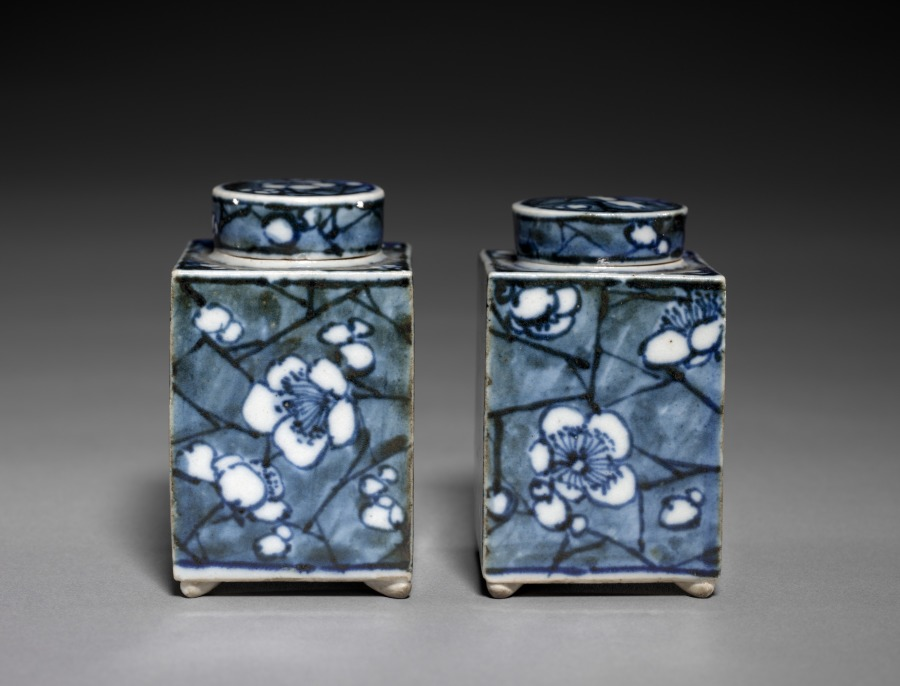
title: Pair of Tea Containers with Plum Blossoms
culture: Japan, Edo period (1615–1868)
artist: Aoki Mokubei (Japanese, 1767–1833)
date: early 1800s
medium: porcelain with underglaze blue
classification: Ceramic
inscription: signed "Ro Mokubei" on base in underglaze blue.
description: Aoki Mokubei, born into a family of restaurateurs, was a potter, calligrapher, painter, and scholar, and is considered one of the three masters of later Edo period Kyoto ceramics. He specialized in porcelains fashioned after Chinese prototypes, and created works for steeped tea (sencha) such as these matching tea caddies decorated in an underglaze blue called sometsuke—literally “with applied dye.” He signed them on their bottoms. They also have intricately patterned silk sleeves to both beautify and protect them. On the exterior of the lid of the outer wooden box that contains them, it is written that Mokubei inscribed and painted an image on the box. On the interior of the lid, the signature and seals of a former owner are written. Mokubei has signed the lid of the inner box, and a charming ink and light color composition of West Lake in Hangzhou in China covers its three sides. On the fourth side is a long inscription by Mokubei describing the scene.